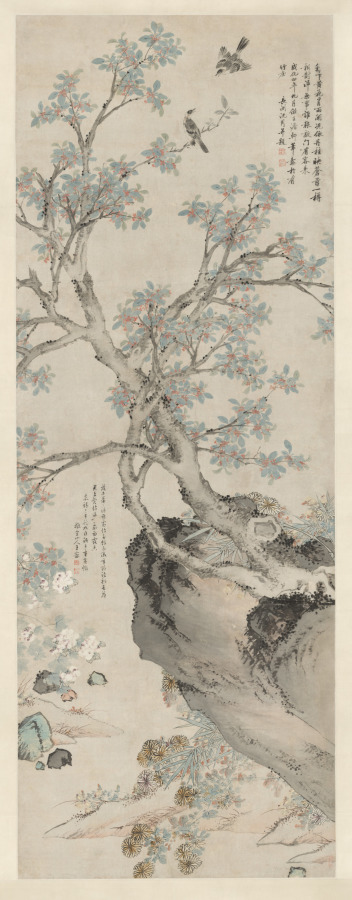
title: Yellow Chrysanthemums and Red Osmanthus in the Style of Wang Yuan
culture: China, Ming dynasty (1368–1644)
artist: Shen Zhou (Chinese, 1427–1509)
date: 1468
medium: hanging scroll, ink on paper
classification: Painting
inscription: Artist's inscription, signature, and 2 seals at upper right: Beneath the fence yellow [chrysanthemum] flowers brave the rain to blossom;/ Still others lean on the red osmanthus tree and dazzle the deep green moss./ With a goblet [of wine] I face them, entirely without concern;/ Who will answer the knocking at the gate where a guest has arrived? In the ninth month of the fourth year of the Chenghua era [1468], I followed the brush-conception of Wang Danxuan 王澹軒 [Wang Yuan 王淵] at the Youzhuzhuang 有竹庄 [House with Bamboo]. Inscribed and [painted] by Shen Zhou 沈周 of Changzhou 長洲. [seals] Shitian 石田; Shen shi Qinan 沈氏启南. trans. HR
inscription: 1 additional inscription, dated 1523, and 2 seals of Wang Chong 王寵 (1494-1533).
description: Shen Zhou, a native from Suzhou, was descended from a prominent land-owning family with strong ties to literati culture. Because Shen Zhou never entered government service, he had ample opportunity to cultivate the arts of painting, poetry, and calligraphy. Chrysanthemums and red osmanthus both bloom in autumn. The deep orange osmanthus flowers emanate a characteristically sweet fragrance. According to his inscription on the painting, Shen Zhou sought to imitate the style of the Yuan dynasty (1271–1368) painter Wang Yuan. His color-filled brushstrokes and washes, however, anticipate the flower painting style of Yun Shouping, whose Peonies are also in the Cleveland Museum of Art collection, https://www.clevelandart.org/art/1967.192. The sheer size and complex composition of this scroll are impressive.